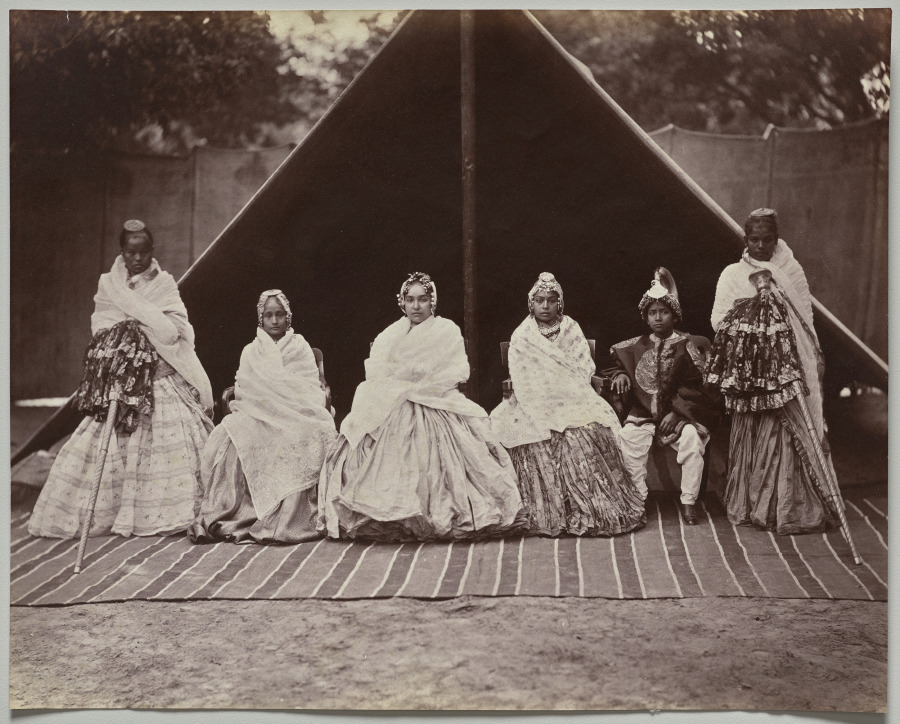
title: Three of Sri Tung Bahadur's Favorite Wives and His Youngest Son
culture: England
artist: Bourne & Shepherd (British, active India, 1868–2016)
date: c. 1870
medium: albumen print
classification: Photograph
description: Jung Bahadur Rana (1817-1877), prime minister and ruler of Nepal from 1846-1877, made the governmental systems of England and France the models for his modernization of his country’s governance. His admiration for Europe led to the women of his court incorporating aspects of European fashion into their dress, such as the voluminous skirts and shawls seen here.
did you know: This portrait shows three of the thirteen wives of the ruler of Nepal.